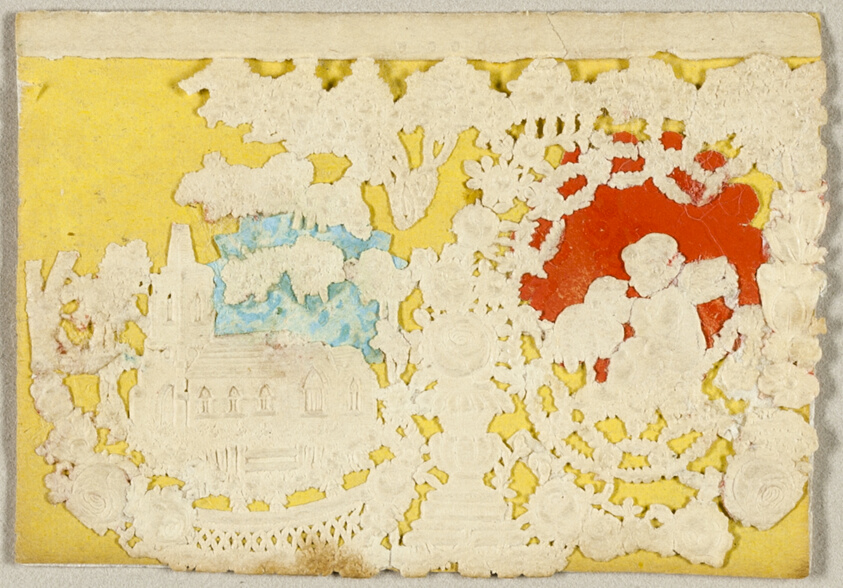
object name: Drawing and Watercolor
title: Untitled Valentine (Church and Cupid)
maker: Thomas Wood (English, 19th century)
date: 1850/59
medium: Collaged elements under cut and embossed (designed) ivory wove paper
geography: England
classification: collage; valentine; prints and drawing; paper